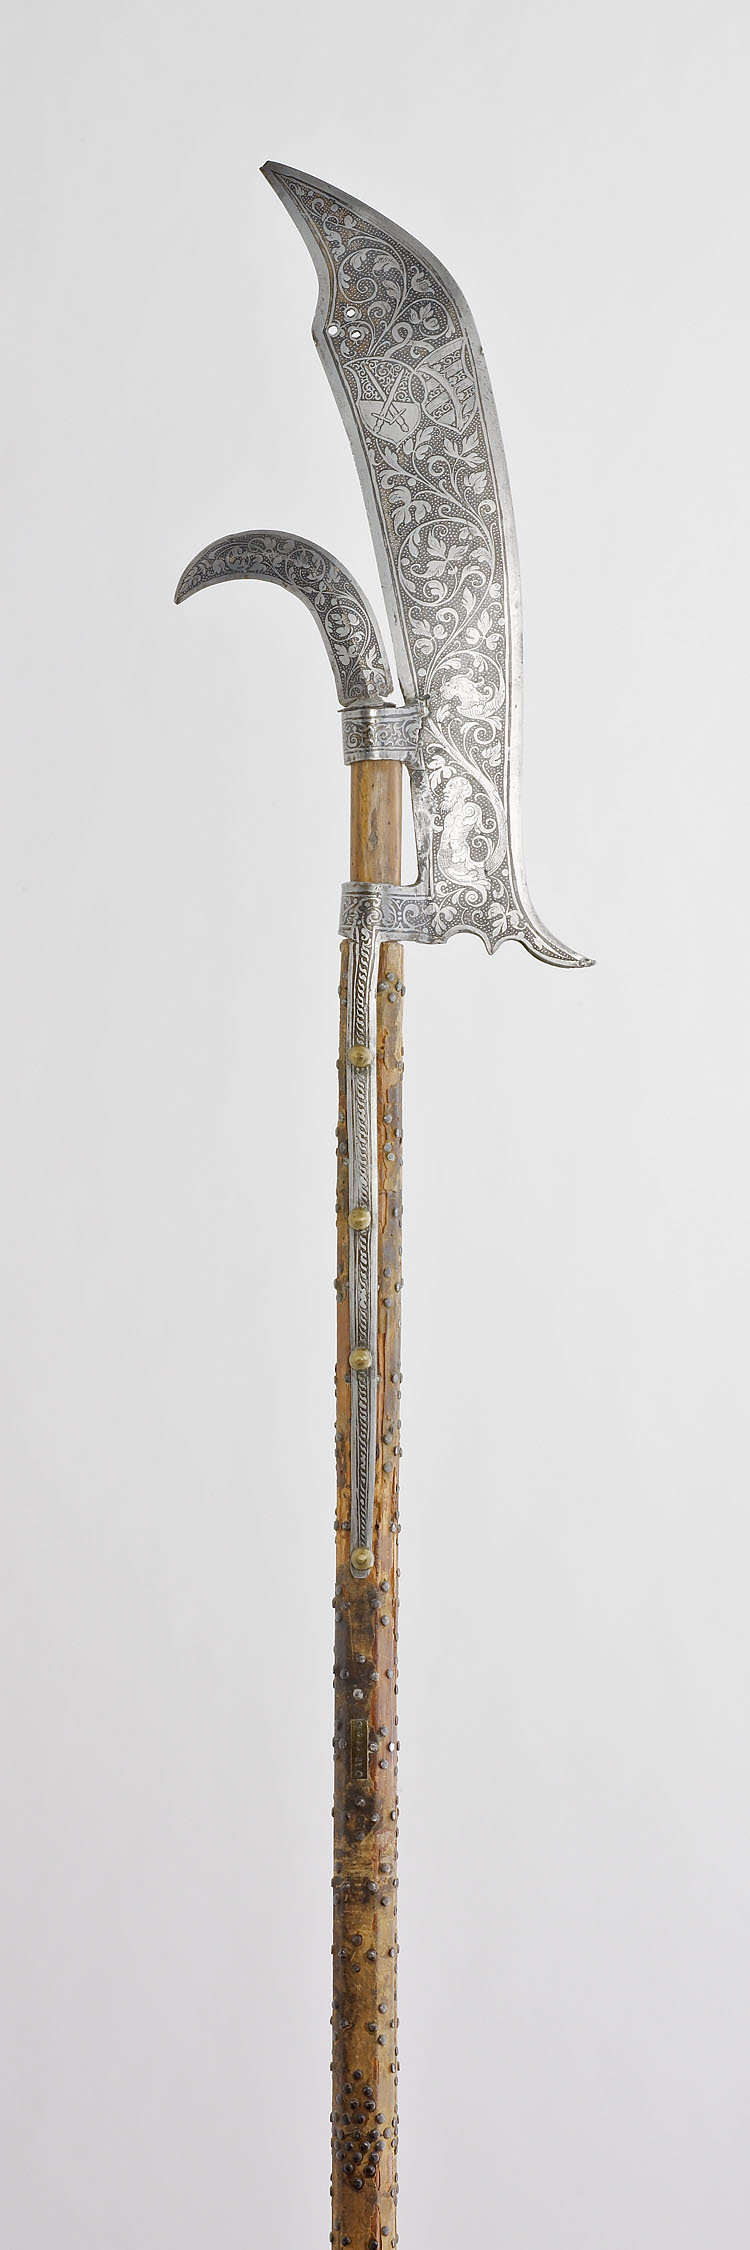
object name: Arms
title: Glaive of the Bodyguard of August I, Elector of Saxony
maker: German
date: 1580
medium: Steel, brass, wood, and silk textie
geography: Saxony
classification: edged weapon-staff; arms; arms and armor